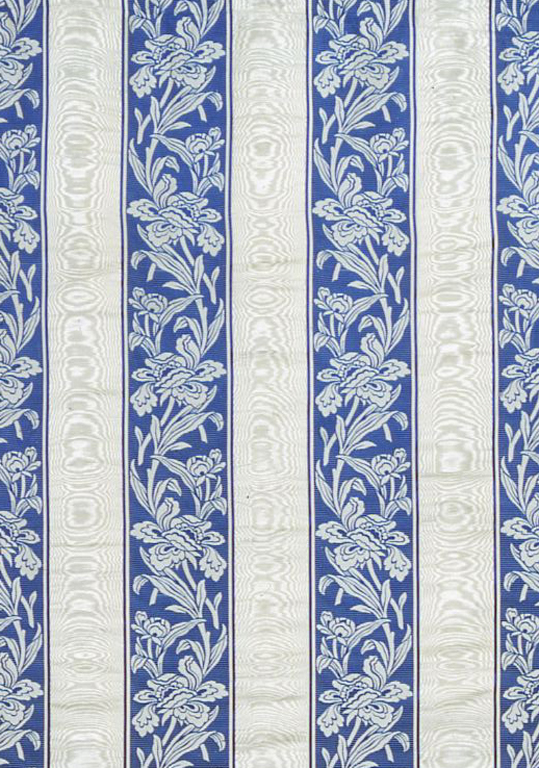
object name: Textile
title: Panel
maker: France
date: 1801/25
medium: Silk, stripes of warp-float faced 7:1 satin weave, plain weave with supplementary patterning warps and plain weave; watered (moire)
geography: France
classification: textile; weaving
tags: fashion